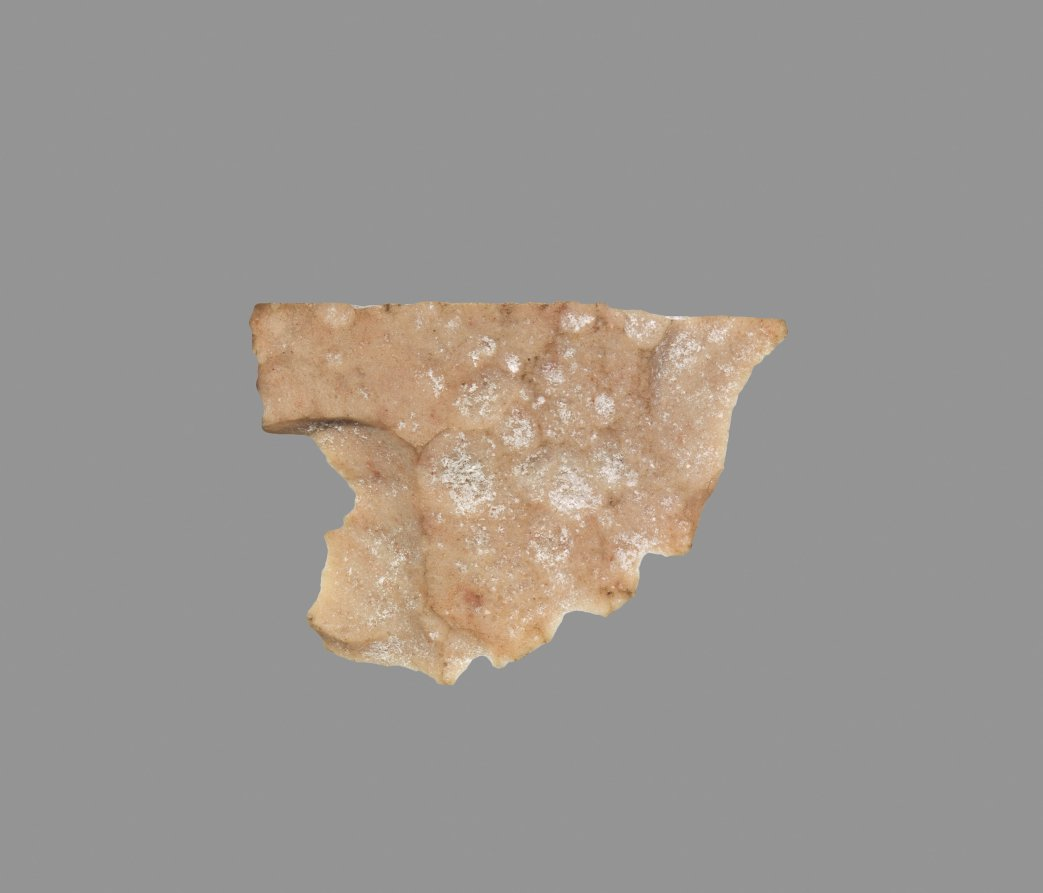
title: Sickle Blade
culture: Egypt, Middle Kingdom (2040–1648 BCE), Dynasty 12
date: 1980–1801 BCE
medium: flint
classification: Implements